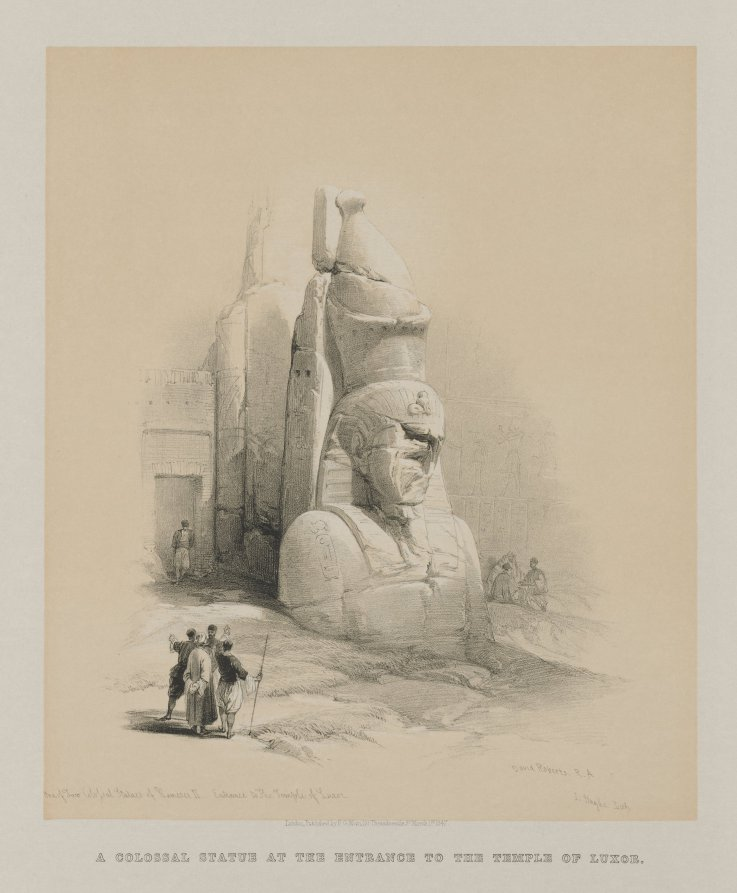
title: Egypt and Nubia, Volume I: One of Two Colossal Statues of Rameses II. Entrance to the Temple of Luxor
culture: England, 19th century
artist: Louis Haghe (British, 1806–1885)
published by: F. G. Moon, 20 Threadneedle Street, London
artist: after David Roberts (Scottish, 1796–1864)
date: 1847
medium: color lithograph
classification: Print